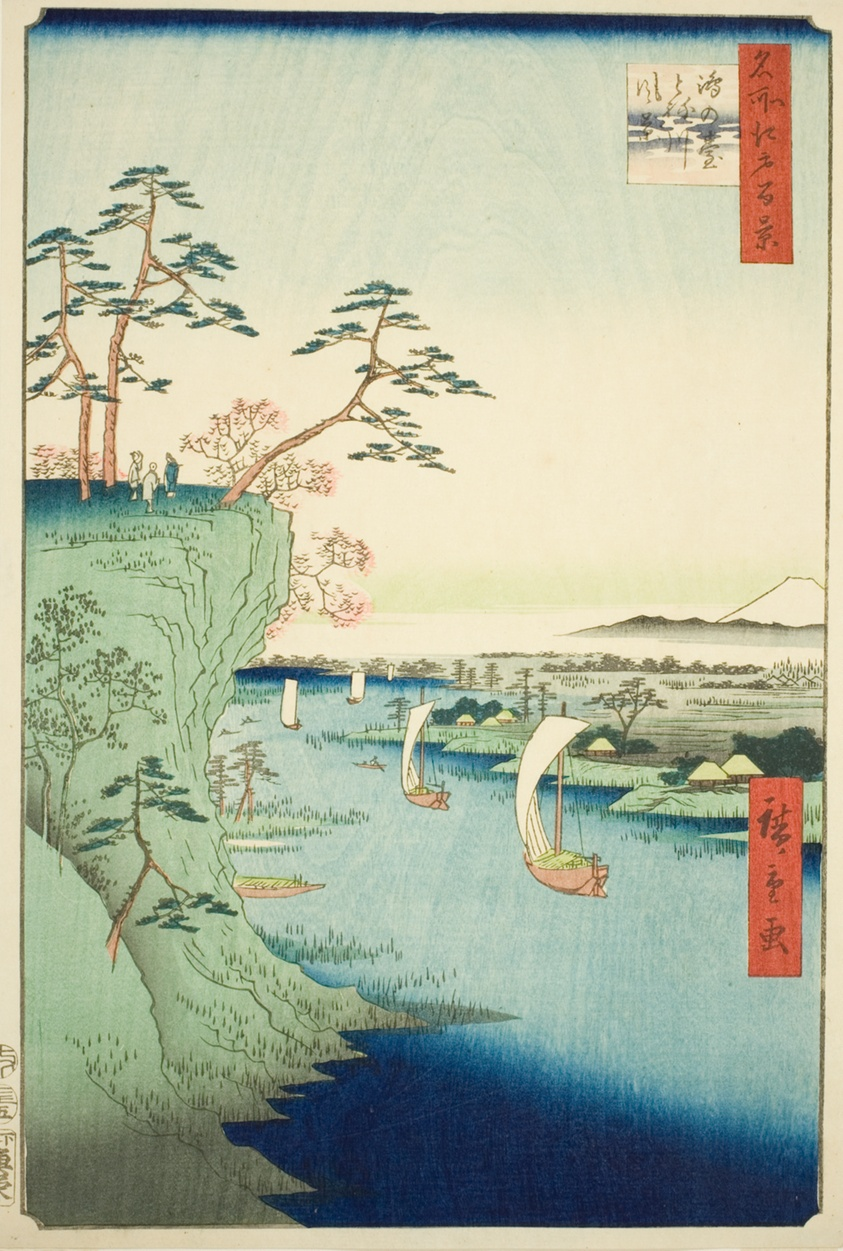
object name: Print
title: View of Konodai and the Tone River (Konodai Tonegawa fukei), from the series "One Hundred Famous Views of Edo (Meisho Edo hyakkei)"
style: Japanese (culture or style)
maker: Utagawa Hiroshige 歌川 広重; Japanese, 1797-1858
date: 1856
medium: Color woodblock print; oban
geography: Japan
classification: woodblock print; print; asian art